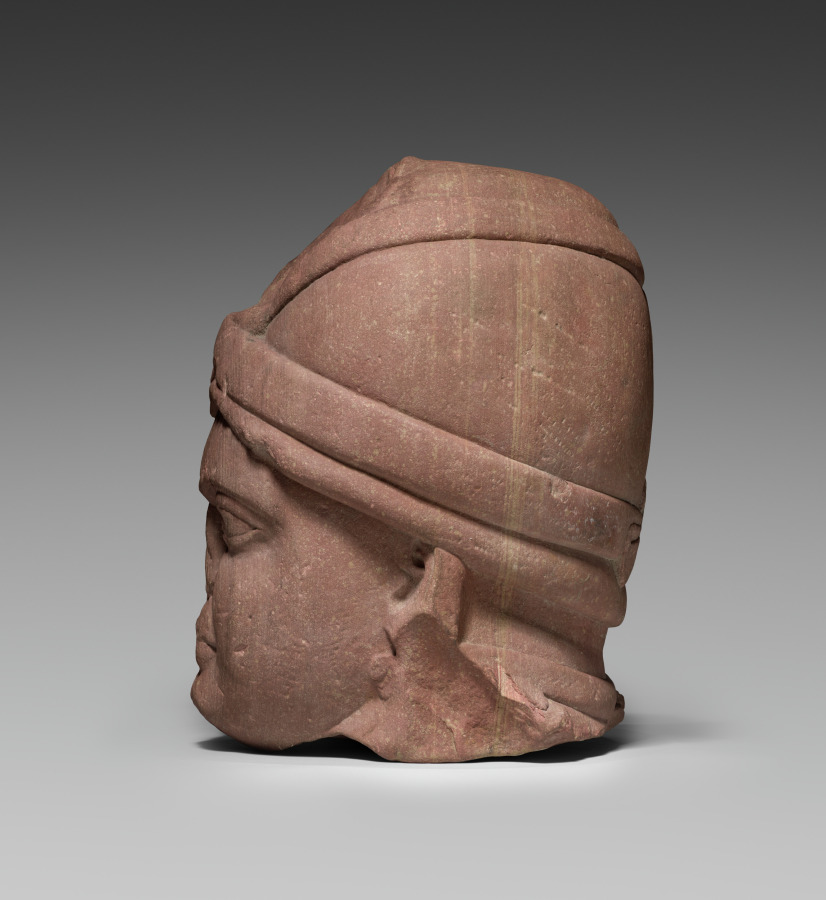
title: Head of a Yaksha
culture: Northern India, Uttar Pradesh, Mathura, Shunga period (185–78 BCE)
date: c. 125 BCE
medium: mottled red sandstone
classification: Sculpture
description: Colossal statues of yakshas, male divinities who personify the productive forces of nature, were especially popular in the northern Indian region around the ancient city of Mathura. They were installed in shrines in parks and gardens, often associated with extraordinary trees. The red sandstone is from a nearby quarry, called Sikri.